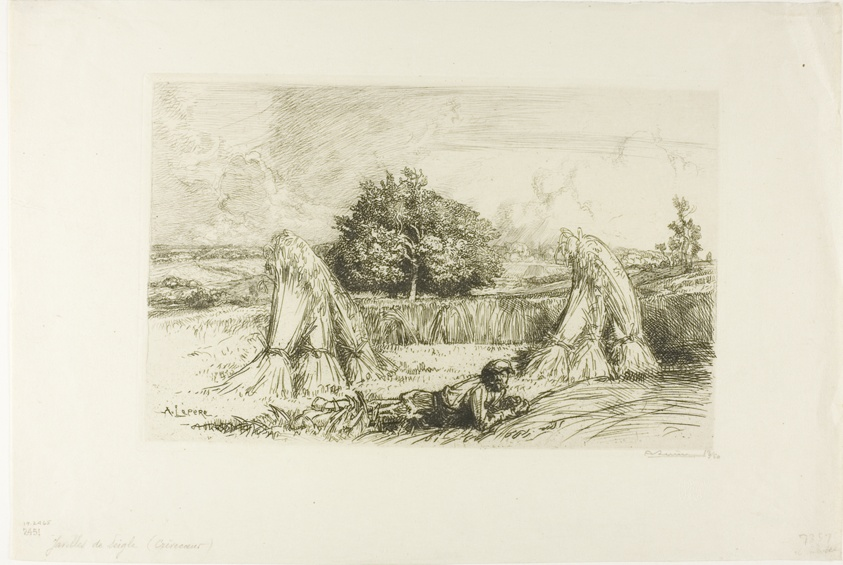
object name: Print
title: Sheaves of Rye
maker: Louis Auguste Lepère (French, 1849-1918)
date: 1913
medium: Etching on cream laid Japanese paper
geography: France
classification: etching; print; prints and drawing